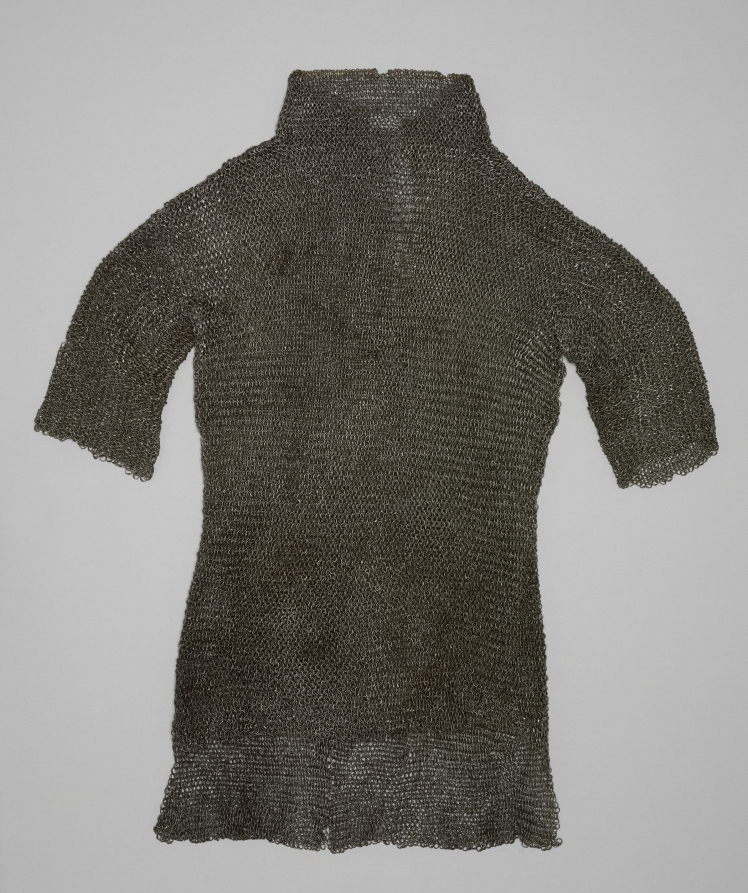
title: Hauberk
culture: European, 15th century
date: 1400s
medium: riveted steel rings; close woven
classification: Arms and Armor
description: By the early 1400s the hauberk was being worn as an accessory to supplement full or partial plate armor. It offered a secondary level of protection for areas not fully covered by plate armor, such as the armpit and groin. The making of chainmail involved the linking of thousands of small rings of steel.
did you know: Mail provided excellent defense against the sword cut, though only limited defense against crushing blows from weapons like the mace or the battle axe.